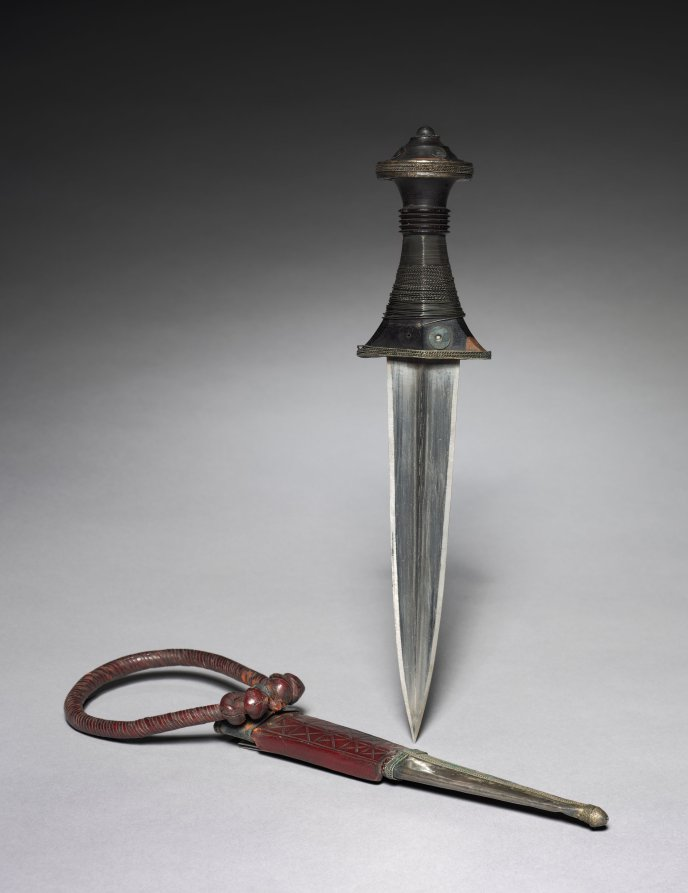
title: Dagger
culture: Africa, East Africa, Sudan, unknown maker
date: 1880–1910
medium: metal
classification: Arms and Armor